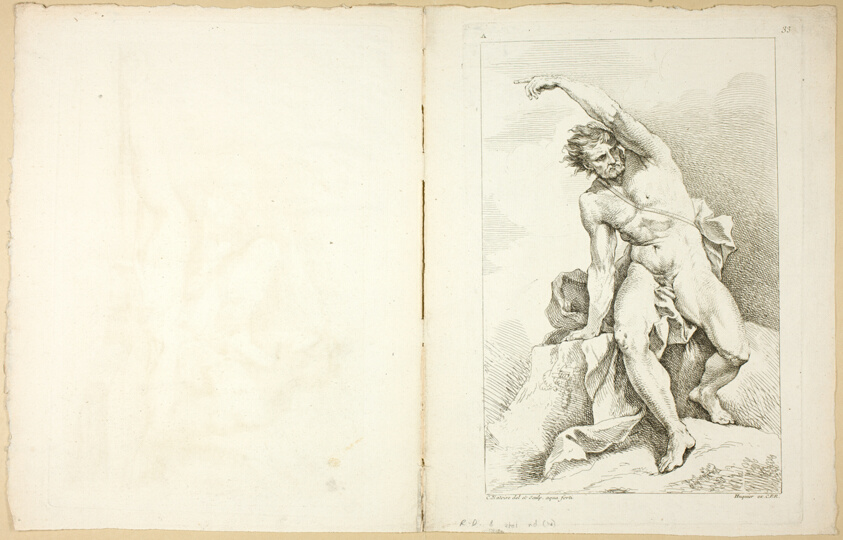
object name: Print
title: Page 33 and Page 36, from Premier Livre de Figures d'Academies gravées en Partie par les Professeurs de l’ Académie Royale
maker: Charles-Joseph Natoire (French, 1700-1777); Collin de Vermont (French, 1693-1761); printed by Gabriel Huquier (French, 1695-1772); published by Charles-Antoine Jombert (French, 1712-1784) (French, 18th century)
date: published 1737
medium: Etching on ivory laid paper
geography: France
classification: etching; print; prints and drawing